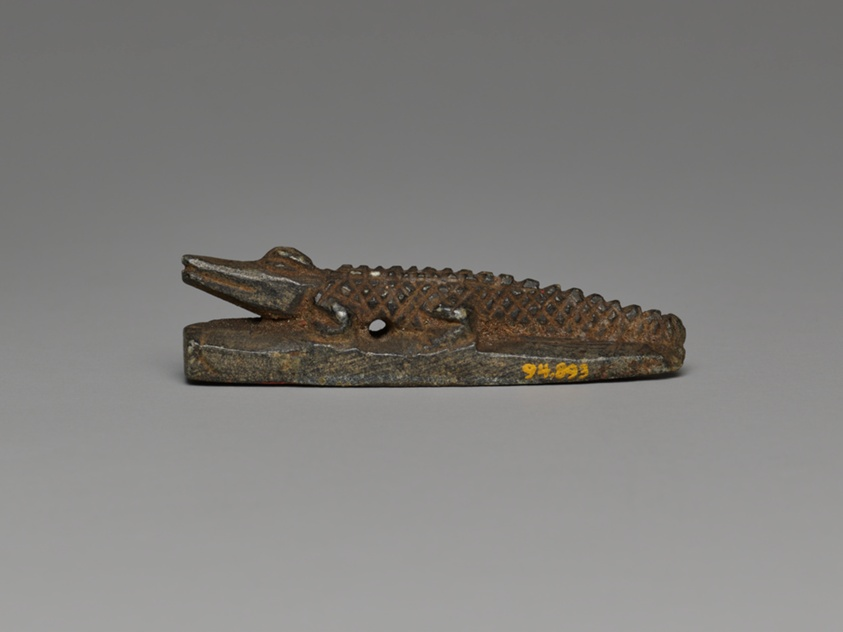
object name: Costume and Accessories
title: Amulet of a Crocodile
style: egyptian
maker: Egyptian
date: New Kingdom–Third Intermediate Period (about 1500–664 BCE)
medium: Steatite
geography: Egypt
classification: amulet; jewelry; stone; ancient art; costume